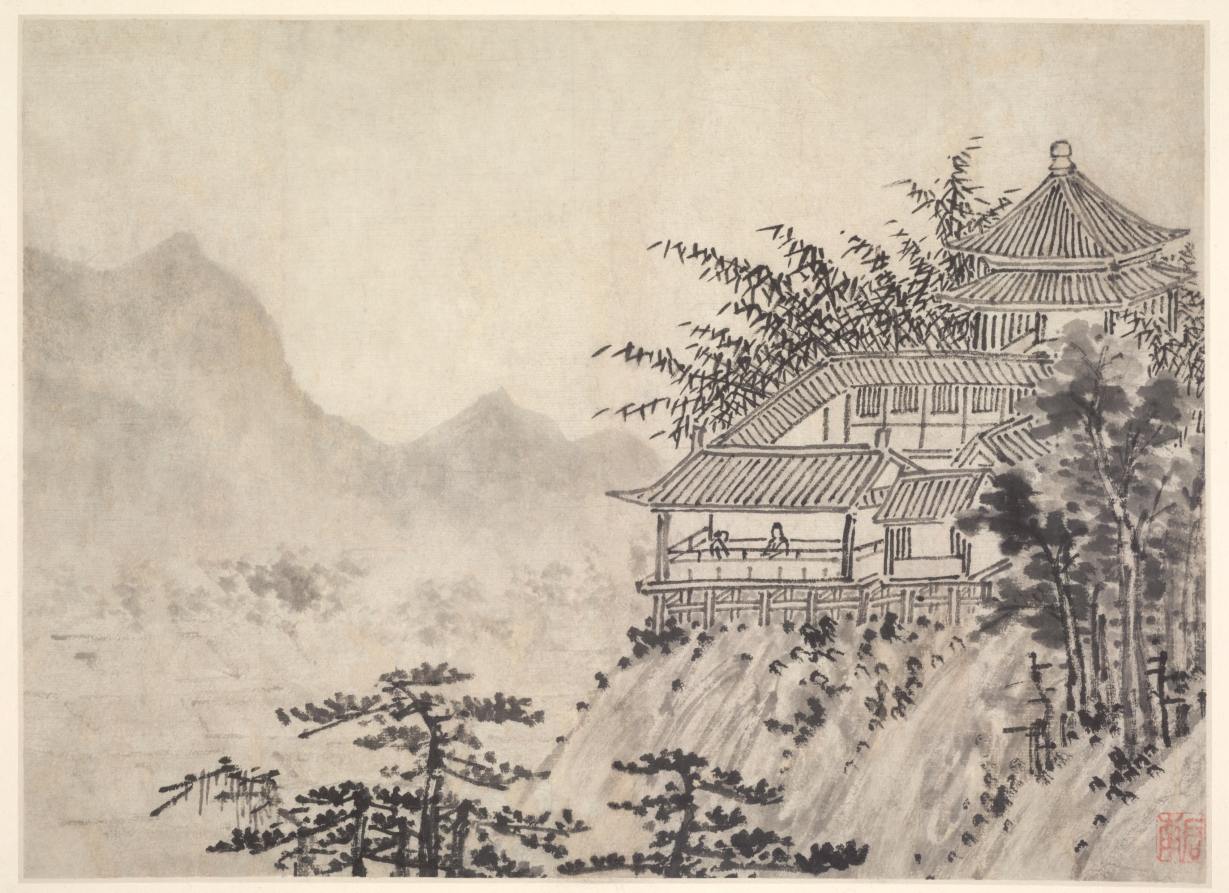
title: The Thousand Acres of Clouds, from Twelve Views of Tiger Hill, Suzhou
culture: China, Ming dynasty (1368–1644)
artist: Shen Zhou (Chinese, 1427–1509)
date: after 1490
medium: Album leaf; ink on paper or ink and slight color on paper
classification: Painting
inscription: [印] 启南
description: Views of Tiger Hill depicts a historic site a few miles northwest of Suzhou. The scenes simulate a visit from arriving by boat at the foot of the mountain to climbing to Cloudy Cliff Monastery. Representations of the artist’s mature style, Shen Zhou included views in subtle colors in the suite of monochrome scenes. A Suzhou native, Shen Zhou was supported by family wealth and rejected an official career in favor of life as a retired scholar. Turning to painting in midlife, he is regarded as the founder of the Wu School of painting, with its center in Suzhou.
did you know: Shen Zhou here painted the view over the Thousand Acres of Clouds.